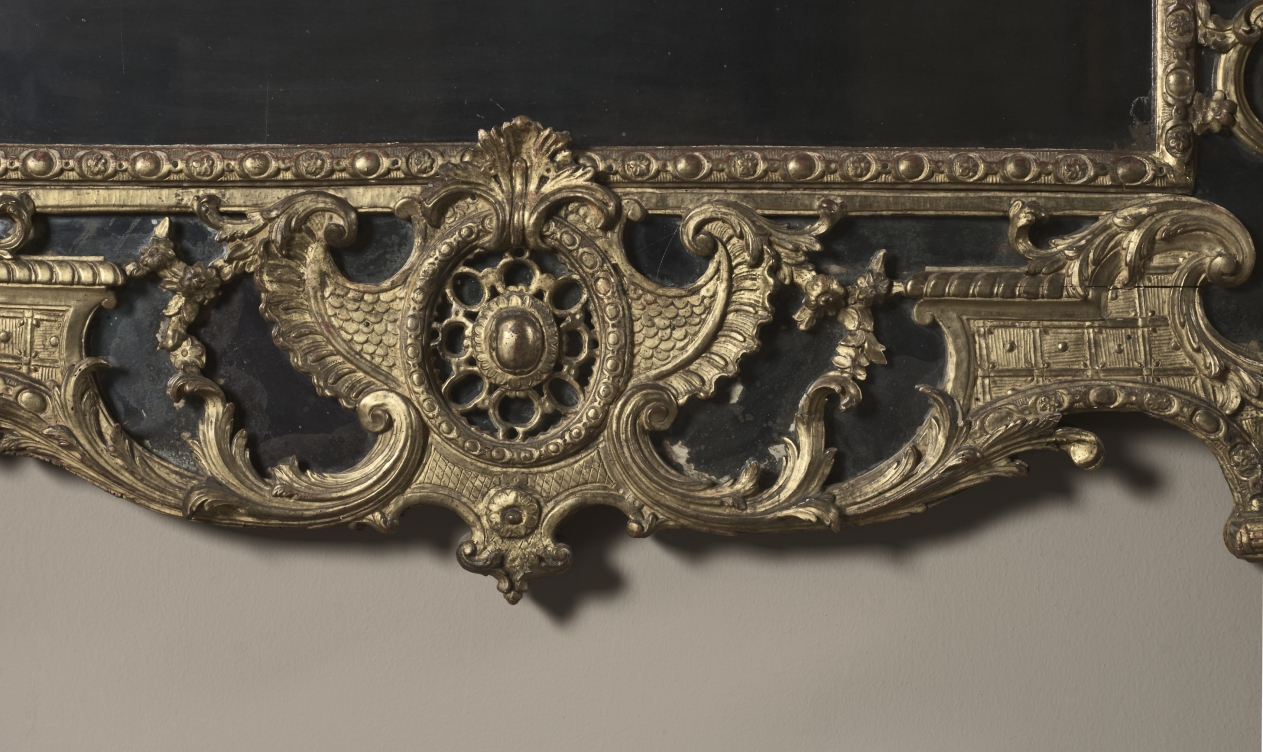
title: Wall Mirror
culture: France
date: c. 1720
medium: carved and gilded wood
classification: Furniture and woodwork